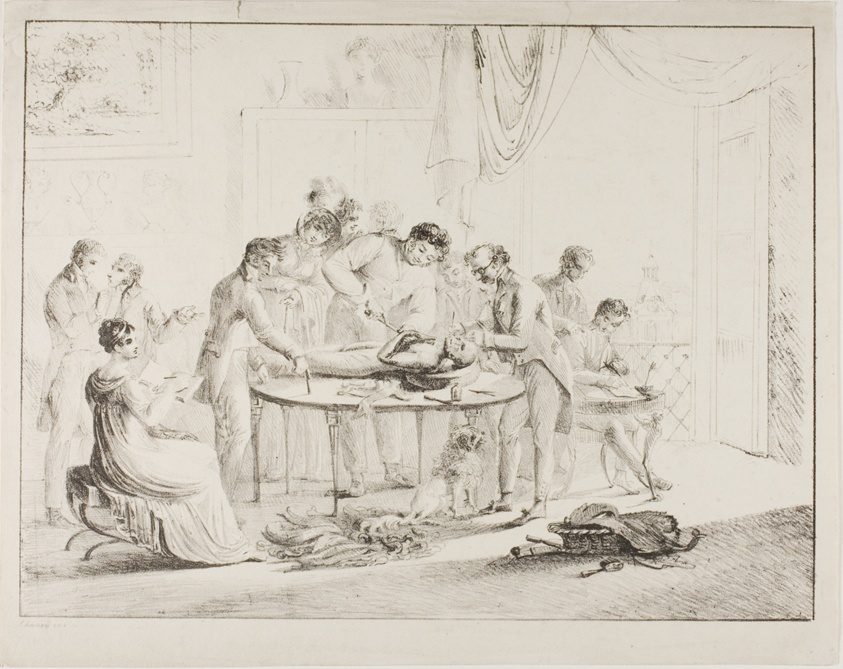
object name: Print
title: Unwrapping the Mummy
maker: Harriet Cheney (British, 1771–1848)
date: before 1825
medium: Lithograph in black on ivory wove paper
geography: England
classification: lithograph; print; prints and drawing